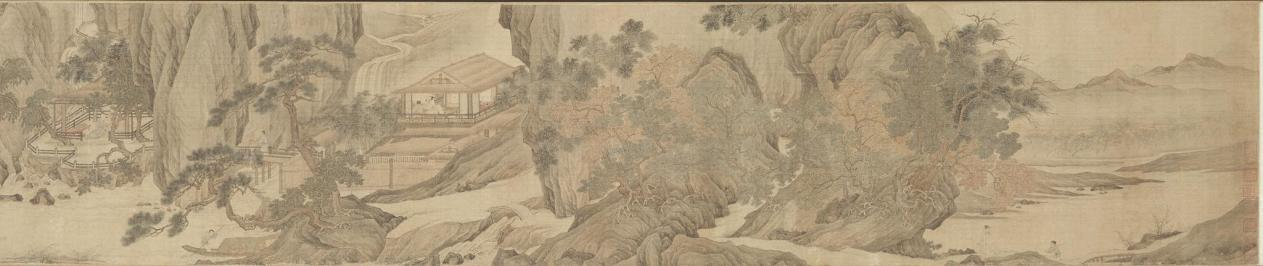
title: Scholar-Hermits in the Autumn Mountains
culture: China, Ming dynasty (1368–1644)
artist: Tang Yin (Chinese, 1470–1523)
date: 1500–1510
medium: handscroll, ink and light color on silk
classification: Painting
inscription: Artist's signature and 2 seals at end of scroll: Tang Yin [seals] T'ang Po-hu; T'ang Tzu'wei t'u-shu.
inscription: Title on frontispiece by Li Cho-kung (dates unknown).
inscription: 1 colophon and 11 additional seals: 1 colophon dated 1915 of Wu Tso-hsi (19th-20th c.); 2 seals of Gao Qifeng 高奇峰 (1889–1933); 5 seals of C. C. Wang 王季遷 (1907–2003); 4 seals unidentified.